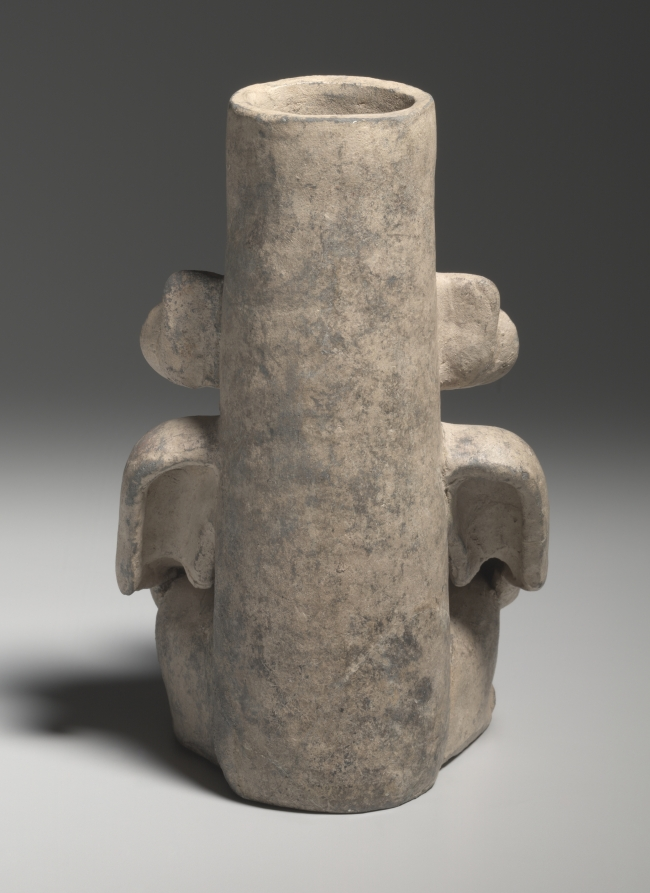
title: Urn Figure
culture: Mexico, Oaxaca, Zapotec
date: c. 200–500 CE (thermoluminescence date, 60 BCE–390 CE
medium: earthenware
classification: Sculpture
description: The figure projecting from the front of a cylindrical container wears a mouth mask perhaps shaped as a serpent’s fanged upper jaw. It probably served in a tomb as a companion to a larger, more complex figural urn. Though termed "urns," these ceramics do not contain the cremated ashes of the dead but usually are found empty.